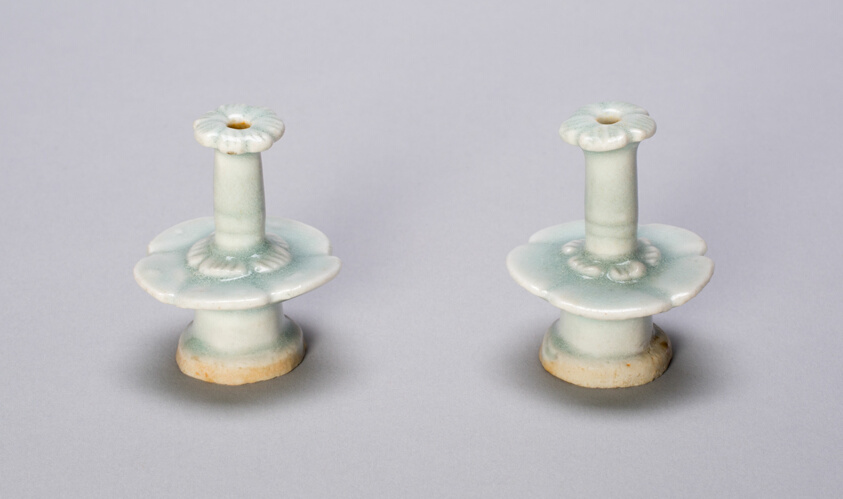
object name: Decorative Arts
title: Pair of Miniature Candlestands with Petal-lobed Nozzles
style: Chinese (culture or style)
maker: China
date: Southern Song dynasty (1127–1279), late 13th century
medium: Qingbai-type ware; glazed porcelain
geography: China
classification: ceramics; decorative arts